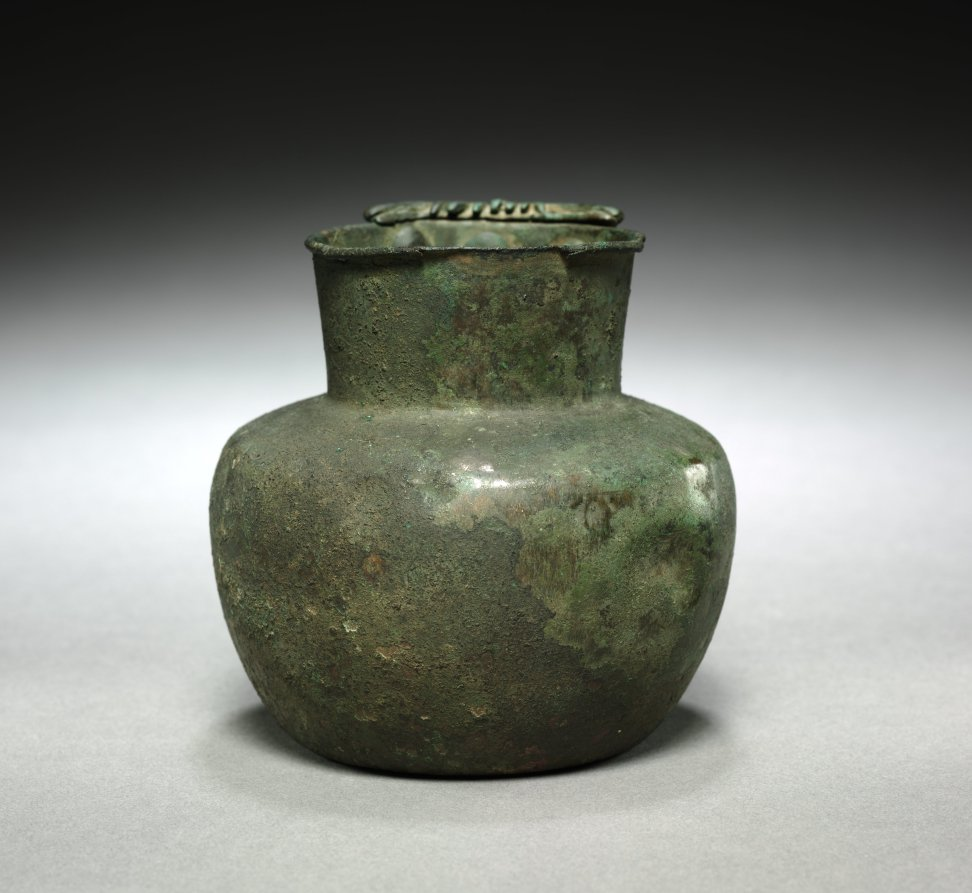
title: Jug or Pitcher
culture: Egypt, New Kingdom (1540–1069 BCE), Dynasties 18–19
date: 1350–1186 BCE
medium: bronze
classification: Vessels